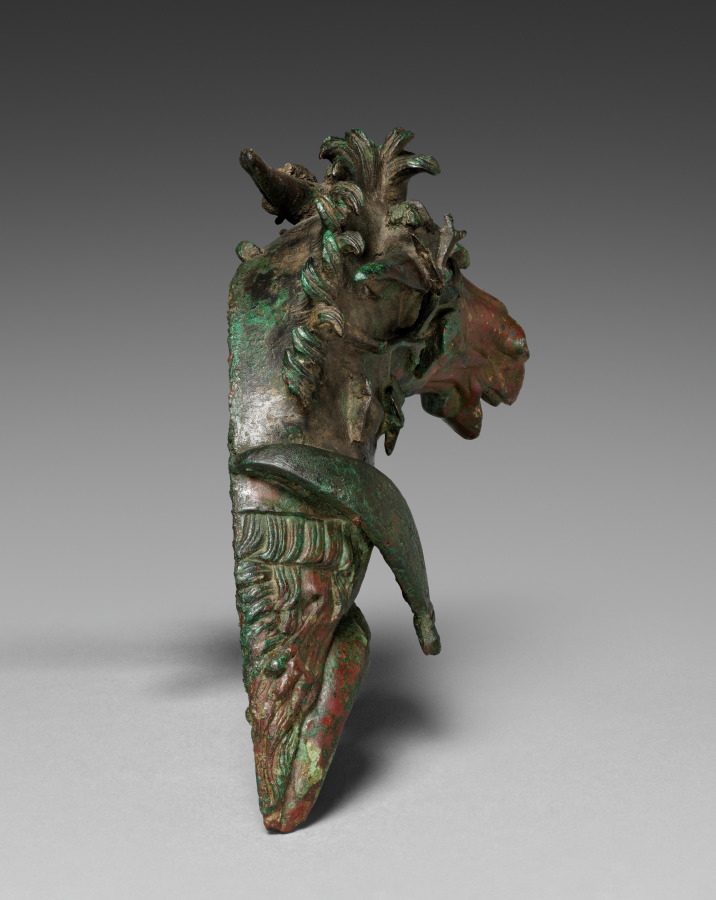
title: Mule-Head Attachment for a Couch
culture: Greece, Hellenistic period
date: 200–100 BCE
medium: bronze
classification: Sculpture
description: This bronze attachment in the shape of a mule’s head was once part of a fulcrum (armrest) for a banqueting couch. The mule’s mane flies upward, its mouth open and its ears pushed back against its head. The mule wears an ivy garland and a saddlecloth made from panther skin, two elements associated with the wine god Dionysos.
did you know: The pattern on the panther skin, called a meander, was also extremely popular on Greek pottery.